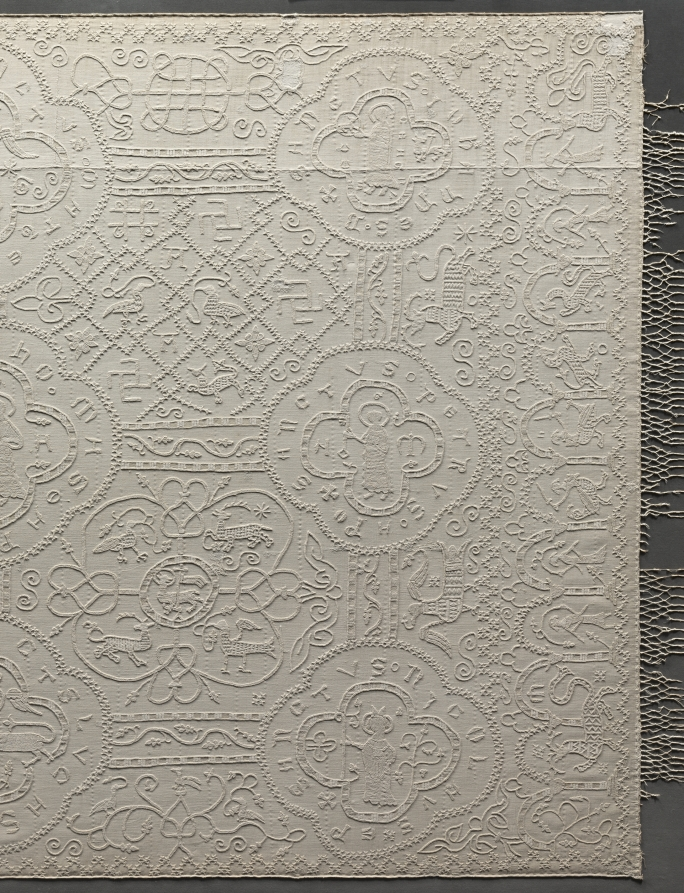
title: Altar Cloth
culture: Germany, Altenberg on the Lahn, Premonstratensian Convent, 14th century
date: c. 1350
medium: embroidery: linen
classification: Embroidery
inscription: various motifs enclosed in quatrefoils with identifying inscriptions in Gothic letters.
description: This large, embroidered altar cloth is one of the rarest, most important medieval church furnishings in existence. It was stitched by nuns in the Premonstratensian Convent in Altenberg on the Lahn River, north of Frankfurt, Germany, and was used to cover the church’s high altar in the weeks leading up to Easter. The cloth is an example of linen embroidery, a specialty of German nuns in the later Middle Ages. The Altenberg monastery church once had valuable furnishings; the high altar retable (a decorated frame with sculptures and paintings on the top of an altar) has survived, the main parts of which are now in the Städel Museum in Frankfurt, Germany.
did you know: When lit from behind, the previously hidden details emerge and the complex design becomes evident.